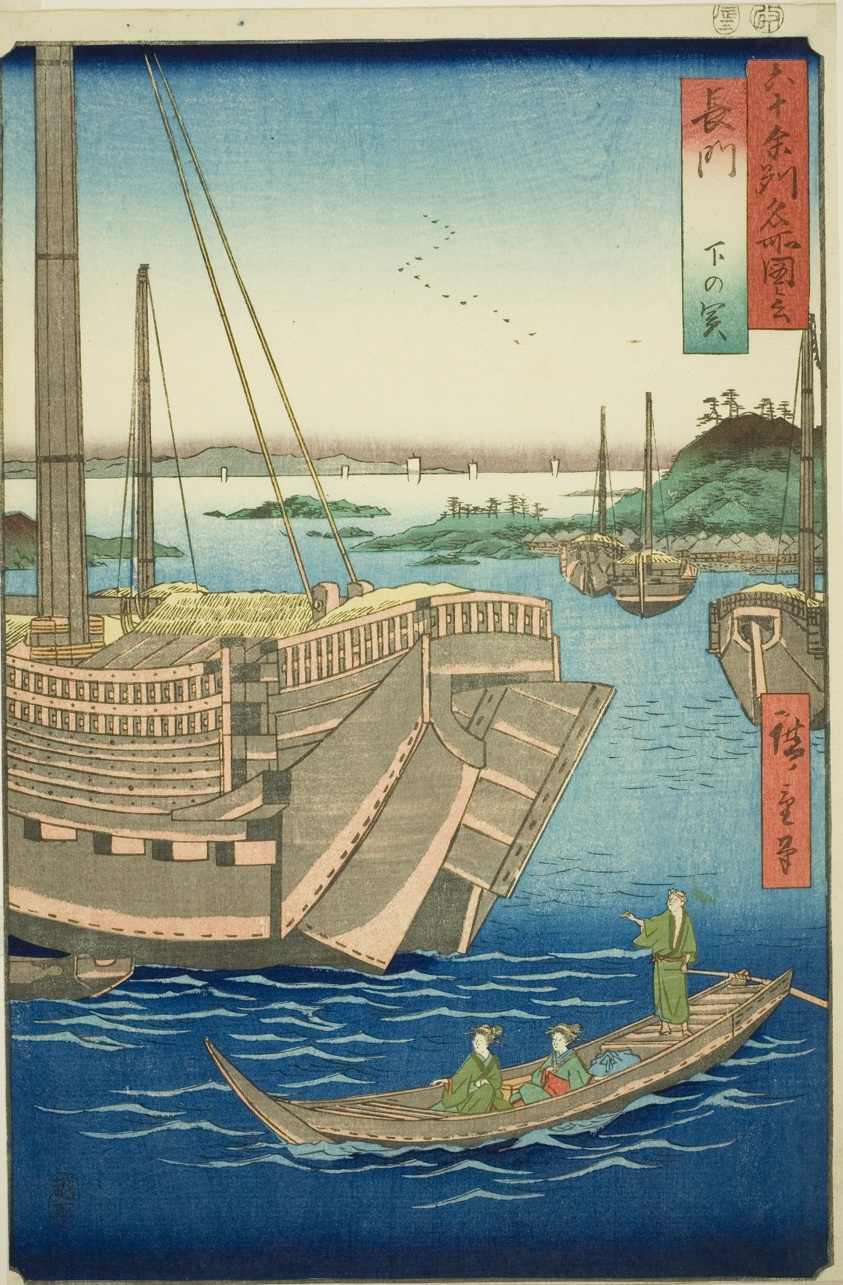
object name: Print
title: Nagato Province: Shimonoseki (Nagato, Shimonoseki), from the series "Famous Places in the Sixty-odd Provinces (Rokujuyoshu meisho zue)"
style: Japanese (culture or style)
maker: Utagawa Hiroshige 歌川 広重; Japanese, 1797-1858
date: 1856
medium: Color woodblock print; oban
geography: Japan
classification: woodblock print; print; asian art